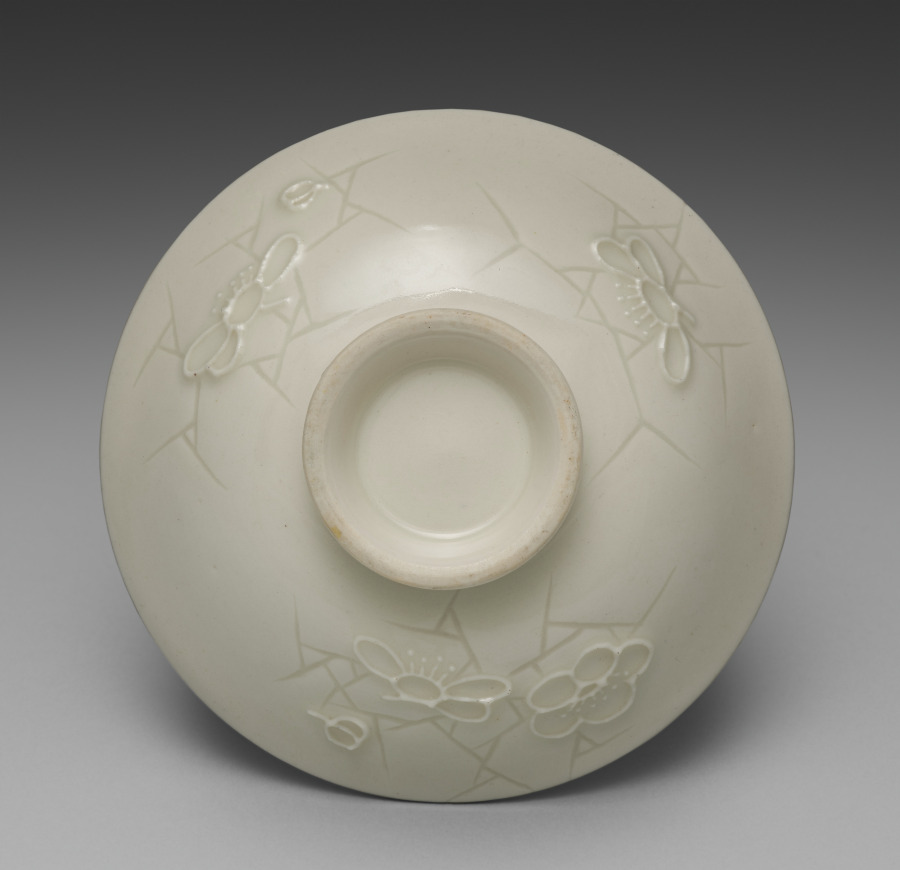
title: Cover for a Bowl from Dining Set with Plum Blossoms and Cracked-Ice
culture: Japan, Meiji period (1868–1912)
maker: Seifū Yohei II (Japanese, 1844–1878)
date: c. 1875–78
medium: Porcelain with molded designs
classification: Ceramic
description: Each item in this set has a delicate low-relief design of flowering plum branches over scattered, intersecting lines meant to resemble the cracked-ice surface of a frozen body of water and is signed on the base in gold pigment. While Yohei II produced many fine works in underglaze blue, like those produced by Kiyomizu Shichibei, he also made works in quite different styles later in his career, from the early 1870 s. In 1873, he was appointed purveyor to the Industrial Center of Kyoto Prefecture, a designation associated with Kyoto’s efforts to reach an international market through the port of Kobe; and from 1875 until his death, he was involved in national-level projects to present Japanese ceramics across the world. It was during this period that Yohei III was apprenticed to Yohei II, and it has been suggested that this set may in fact be an early example of Yohei III’s work, which he signed with his teacher’s name. Decorated with flowers resembling Japanese textile motifs, the set calls to mind the design of Yohei II’s pair of vases with plum blossoms in the Victoria and Albert Museum. Here, the elaborate trees created for a formal public exhibition setting have been translated into the approachable blossoms of the genteel domestic environment. While the designs are consistent across the pieces, each raised flower petal and pistil and each incised line in the ice was done by hand, so the cups, bowls, and dishes are similar yet unique. The bottoms of two boxes once identified the set’s owner, but the information has been deliberately obscured with black ink. However, inscriptions still visible appear to indicate two occasions, once at the end of July 1886 , and once again in June 1916 , when parts of the set were requested from Hokura in Niigata Prefecture. The location corresponds to a neighborhood in the present-day city of Jōetsu. The surname Tsuji 辻 also appears on a paper tag affixed to one of the box cloths. Future research may possibly reveal more about their provenance. A vase by Yohei III in a private collection combines the formal grandeur of the Yohei II vases in the Victoria and Albert Museum with the gentler design of this dining set, placing flowering plum trees against soft, scalloped-edge clouds resembling those in golden screens.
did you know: The dining wares have a creamy white coloration that the four boxes containing them identify as Korean in style.